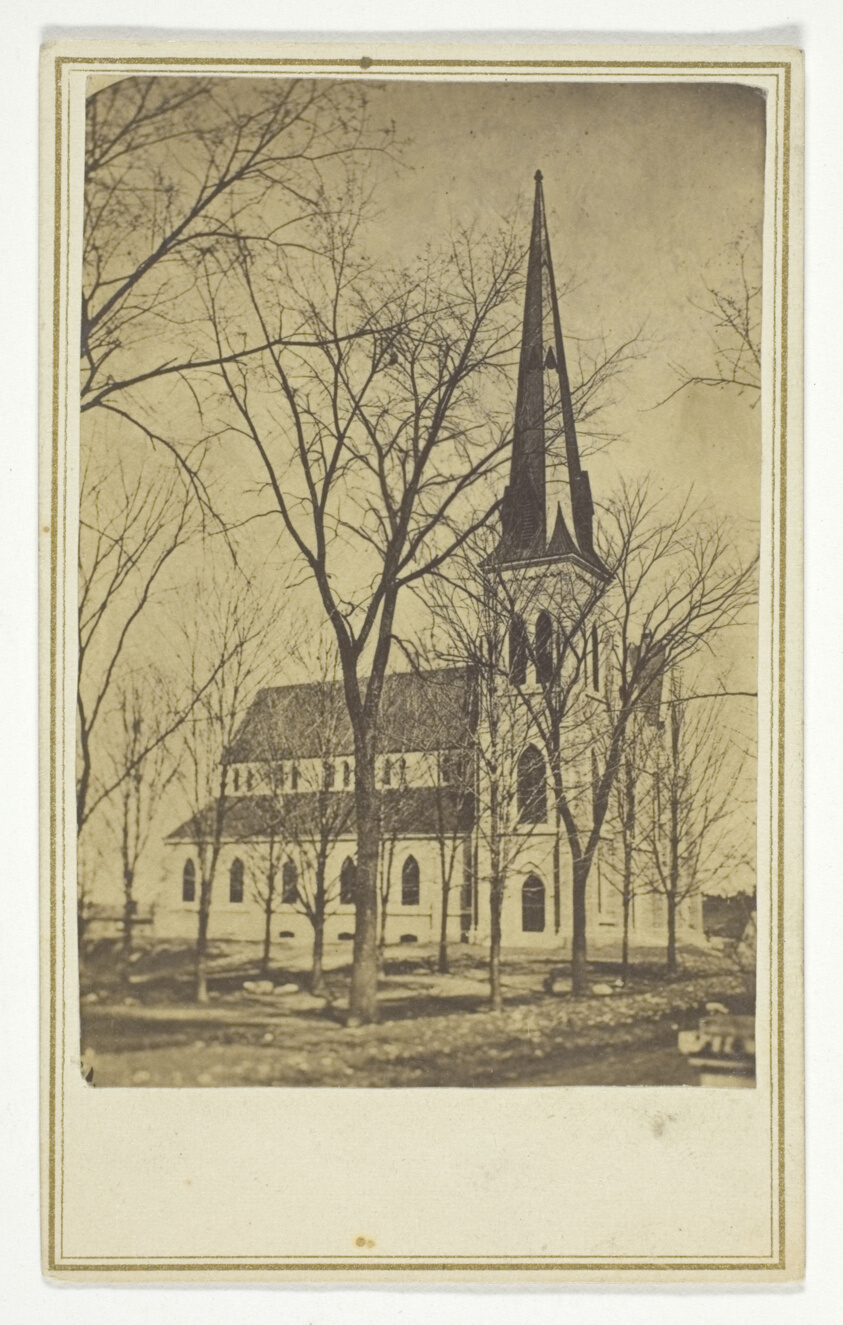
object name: Photograph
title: Untitled (church with pointed spire)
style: 19th century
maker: Hendee (American, 19th century)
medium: Albumen print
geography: United States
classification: photographic process; photography; card photographs; photograph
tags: Collected by Hugh Edwards